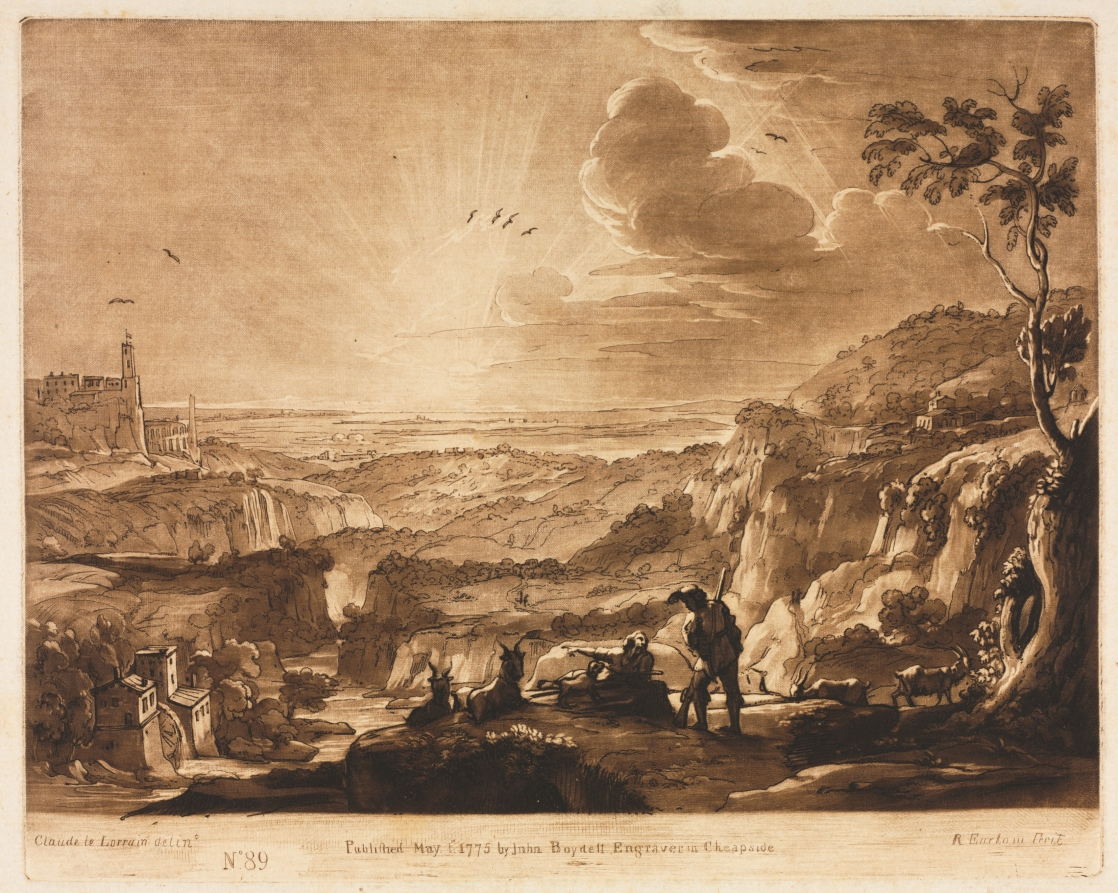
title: Liber Veritatis: No. 89, View of a Mountainous Extended Country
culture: England, 18th century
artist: Richard Earlom (British, 1743–1822)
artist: after Claude Lorrain (French, 1604–1682)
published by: John Boydell (British, 1720–1804)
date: 1775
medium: etching and mezzotint printed in brown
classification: Print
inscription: inscribed lower margin in plate: From the Original Drawing, in the collection of the Duke of Devonshire (according to JB "scratched plate")